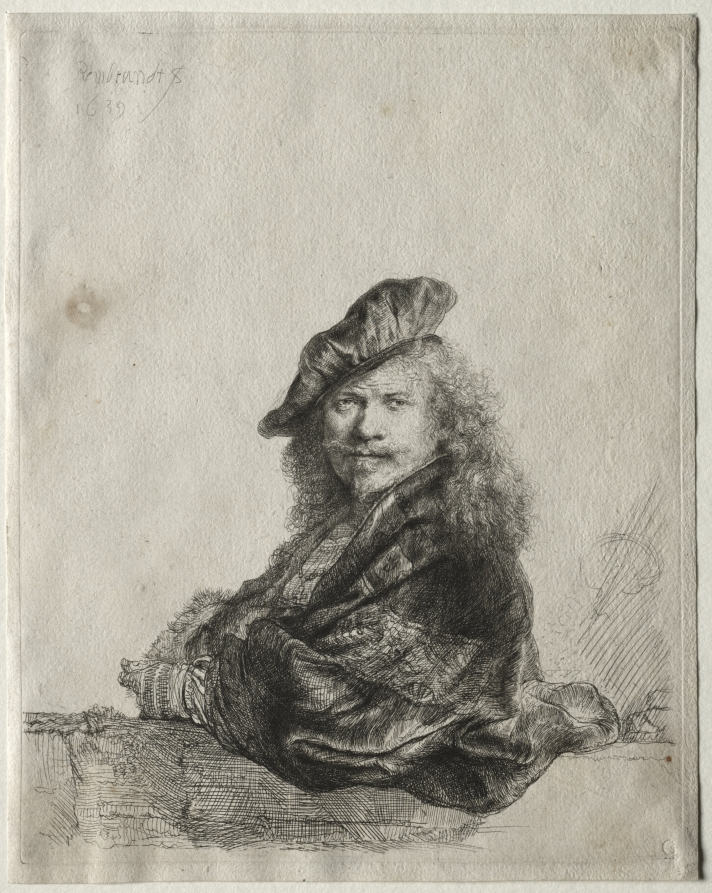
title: Self-Portrait Leaning on a Stone Sill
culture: Netherlands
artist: Rembrandt van Rijn (Dutch, 1606–1669)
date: 1639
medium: etching and drypoint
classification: Print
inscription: upper left, in plate: Rembrandt f / 1639 ; VERSO, lower left, in graphite: B 21 II ; lower center, in graphite: C 13345 J. P. ; lower center, in graphite: K5016 / C5315 ; lower center, in graphite: D 9066- ; lower right, in graphite: 27585 P 55 1/4